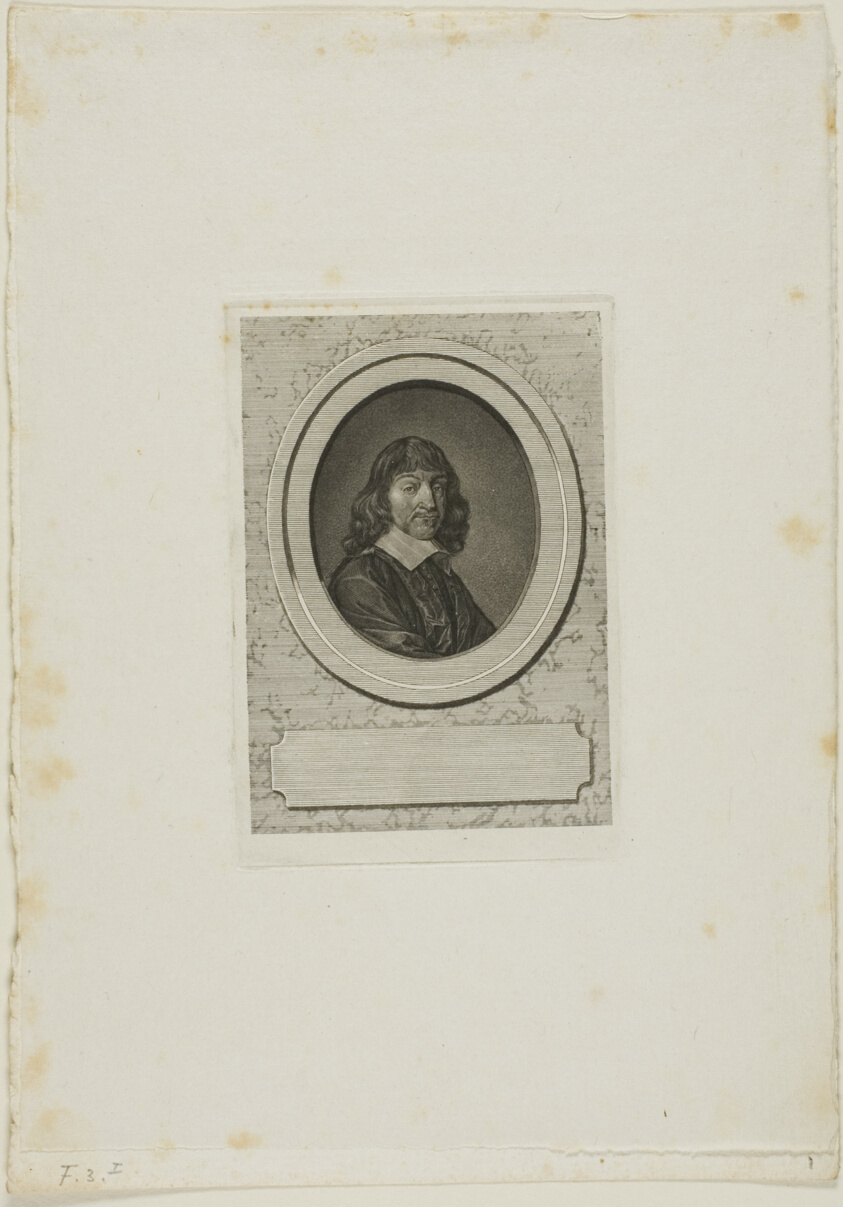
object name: Print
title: Descartes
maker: Jean-Baptiste de Grateloup (French, 1735-1817)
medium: Engraving on paper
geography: France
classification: engraving; print; prints and drawing